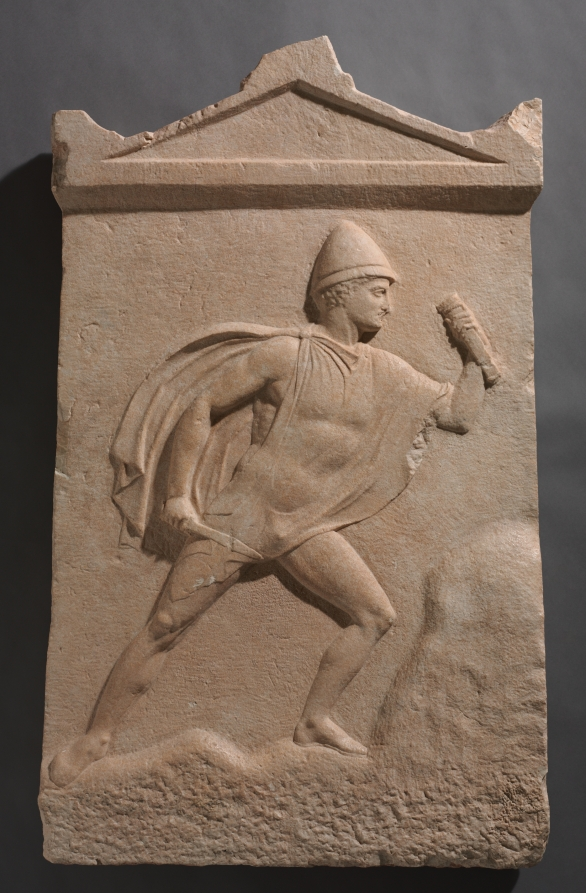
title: Grave Stele of a Warrior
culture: Greece, Boeotia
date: c. 390 BCE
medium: marble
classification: Sculpture